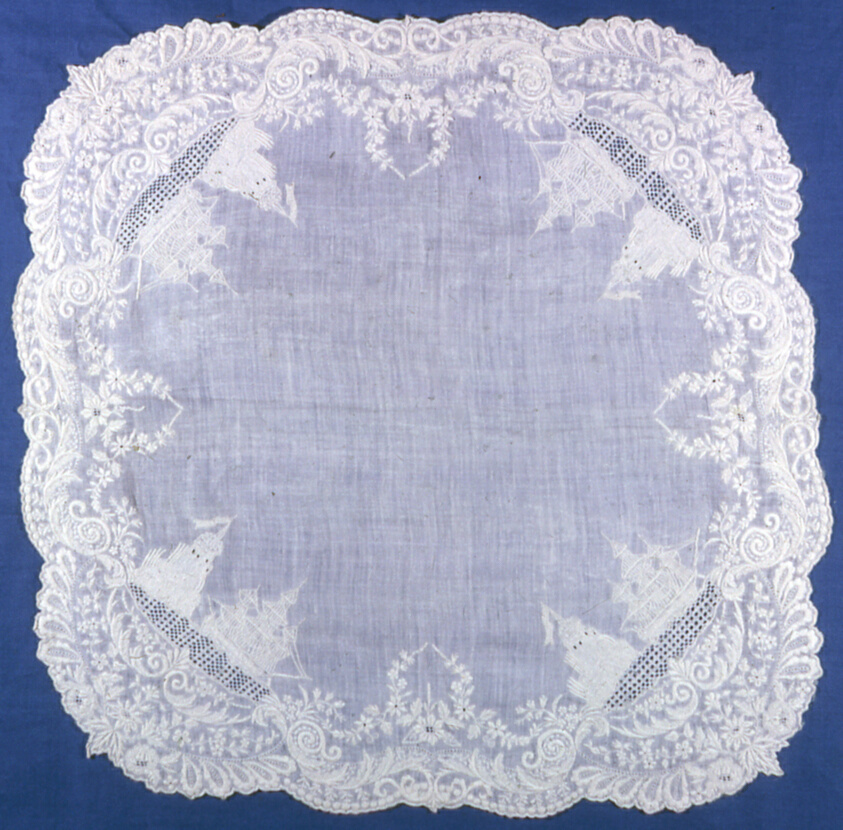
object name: Textile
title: Handkerchief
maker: France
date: 1825/75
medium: Linen, plain weave; embroidered with linen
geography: France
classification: textile; needlework (visual works); accessories (object genre); weaving